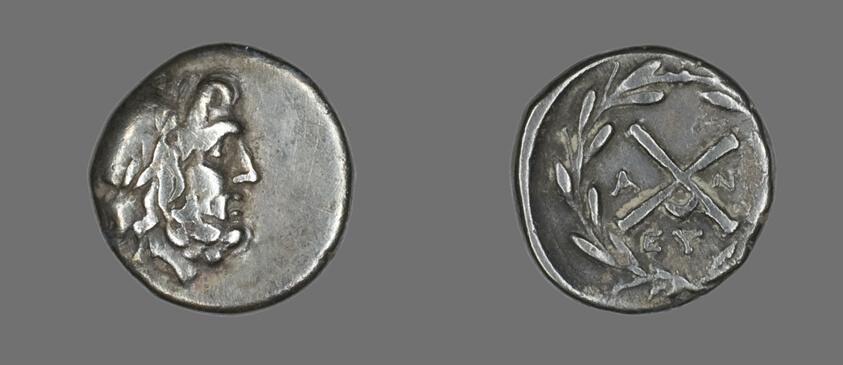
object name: Coin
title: Hemidrachm (Coin) Depicting the God Zeus Amarios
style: greek, ancient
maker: Greek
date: 222-146 BCE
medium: Silver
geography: Ancient Greece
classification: coin; ancient art